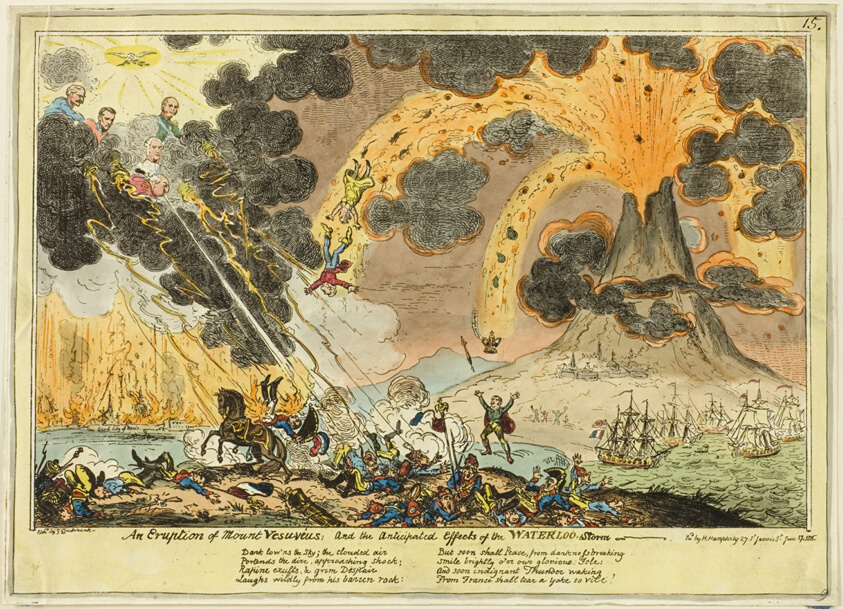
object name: Print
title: An Eruption of Mount Vesuvius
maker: George Cruikshank (English, 1792-1878); after George Humphrey (English, 1773-1831); published by Hannah Humphrey (English, c. 1745-1818)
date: published June 17, 1815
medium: Hand-colored etching on paper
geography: England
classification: etching; print; prints and drawing